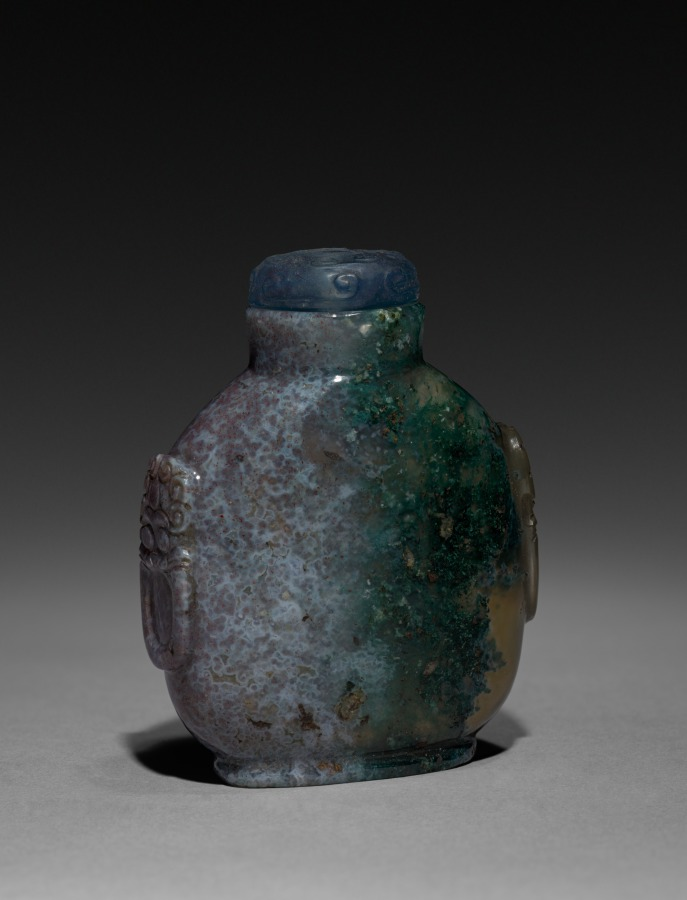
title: Snuff Bottle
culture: China, Qing dynasty (1644-1911)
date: 1644–1911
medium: glass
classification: Glass